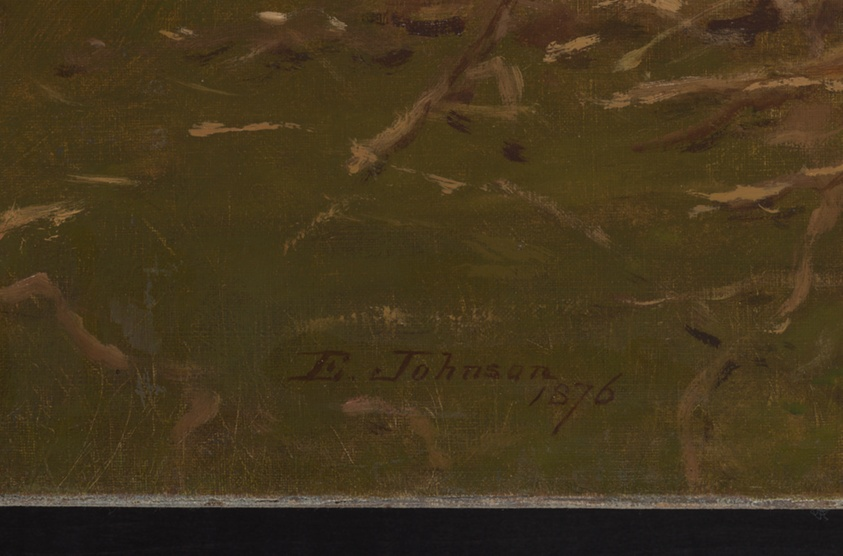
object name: Painting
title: Husking Bee, Island of Nantucket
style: Realism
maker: Eastman Johnson (American, 1824–1906)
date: 1876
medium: Oil on canvas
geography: Nantucket Island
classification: painting; american arts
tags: landscapes, animals